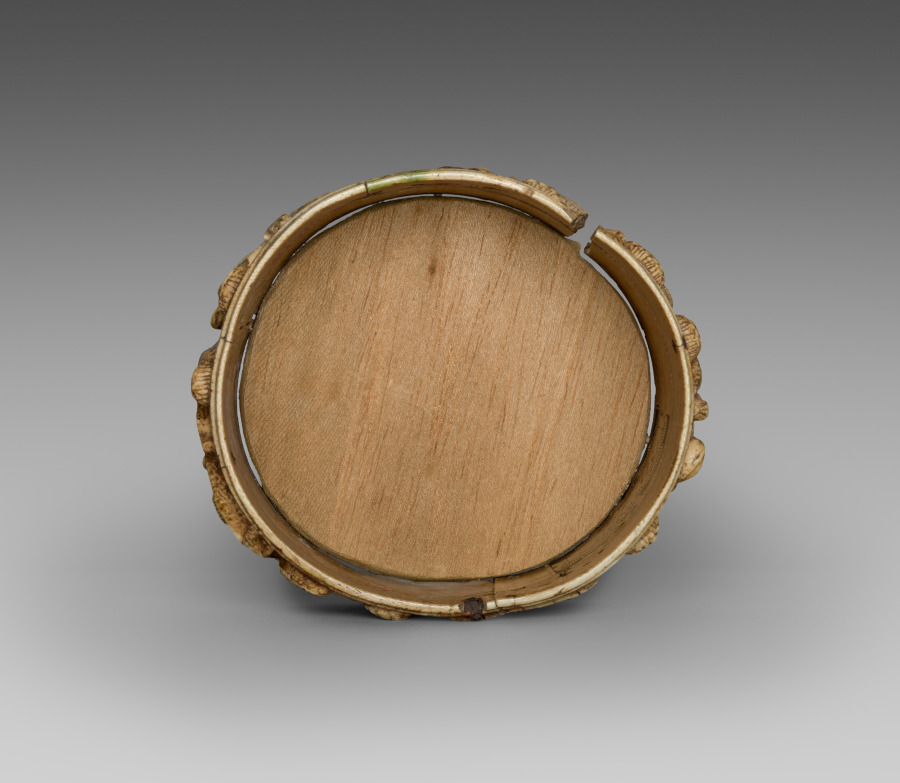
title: Ivory Pyx (Box)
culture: Byzantium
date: 500s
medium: ivory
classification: Ivory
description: Elaborately carved from a section of an elephant’s tusk, this ivory pyx (Greek for "box") depicts a number of New Testament scenes, namely the Annunciation, Christ’s entry into Jerusalem, Christ raising Lazarus, and Christ healing the blind man. It also depicts a Christian altar with chalices, possibly indicating the box’s use in a liturgical context.